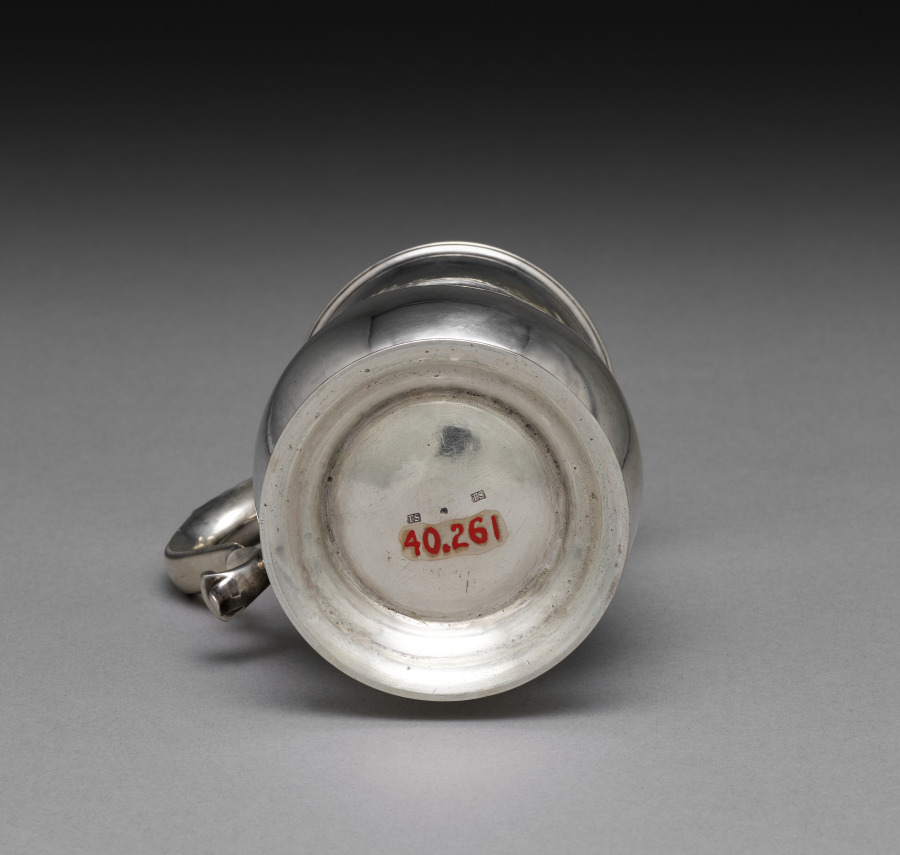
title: Cann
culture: America, Pennsylvania, Philadelphia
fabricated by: Thomas Shields (American)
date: c. 1765–75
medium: silver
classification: Silver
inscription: Scratched underside: "15-3" and illegible scratches